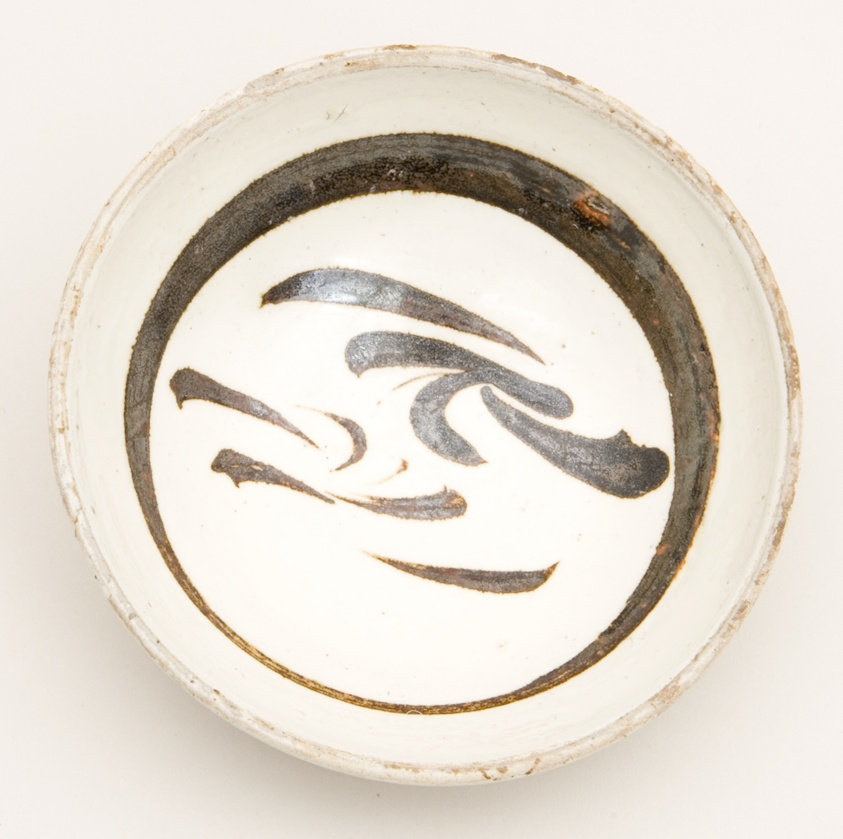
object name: Vessel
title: Bowl with Stylized Leaf-strokes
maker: China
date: Song/Jin dynasty, c. 12th/13th century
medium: Cizhou ware, glazed stoneware painted in iron-brown slip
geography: China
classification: vessel